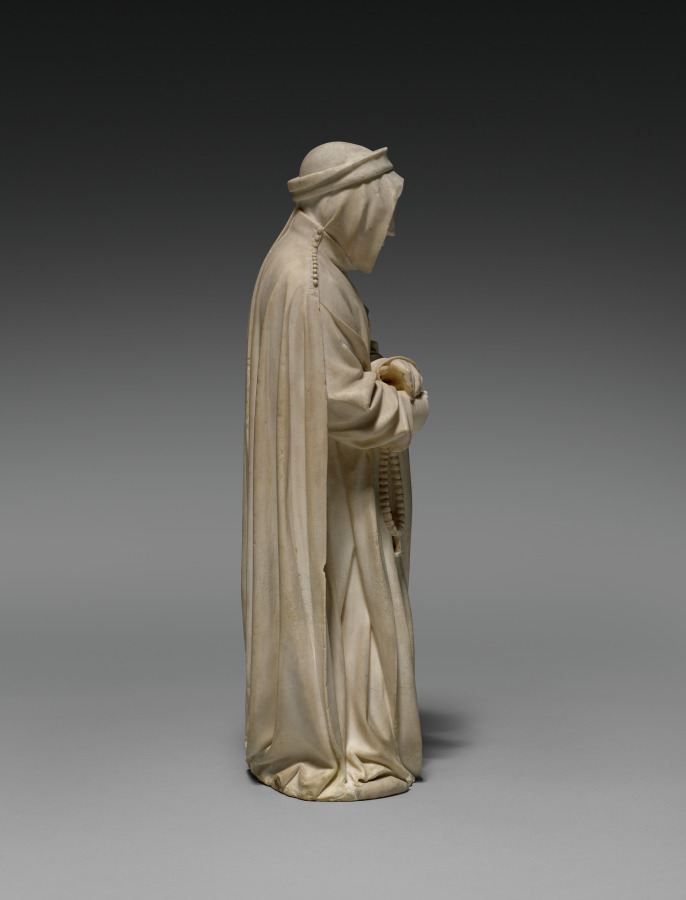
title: Mourner from the Tomb of Philip the Bold, Duke of Burgundy (1364–1404)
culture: Netherlands, active Dijon, 15th century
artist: Claus de Werve (Netherlandish, 1380–1439)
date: 1404–1410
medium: vizille alabaster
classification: Sculpture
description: This figure comes from the tomb of Duke Philip the Bold from the church of Champmol near Dijon (Burgundy, France). Philip, who founded the monastery and designated it as his burial place, hired the best artists, many of whom came from the Netherlands. While the commission was given in 1381, the work was not completed until 1410, six years after the duke’s death. This mourner is unusual for the time because it is not carved as a static low relief on the pedestal of the tomb but interacts with the viewers and their fellow procession members. The lifelike quality of the figure is due in large part to the alabaster. Its softness allowed artists to carve details into the material, and the transparent, milky white stone could also be polished to a high gloss.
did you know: During his life, Duke Philip founded the monastery of Chartreuse de Champmol to serve as a final resting place for himself and his family.